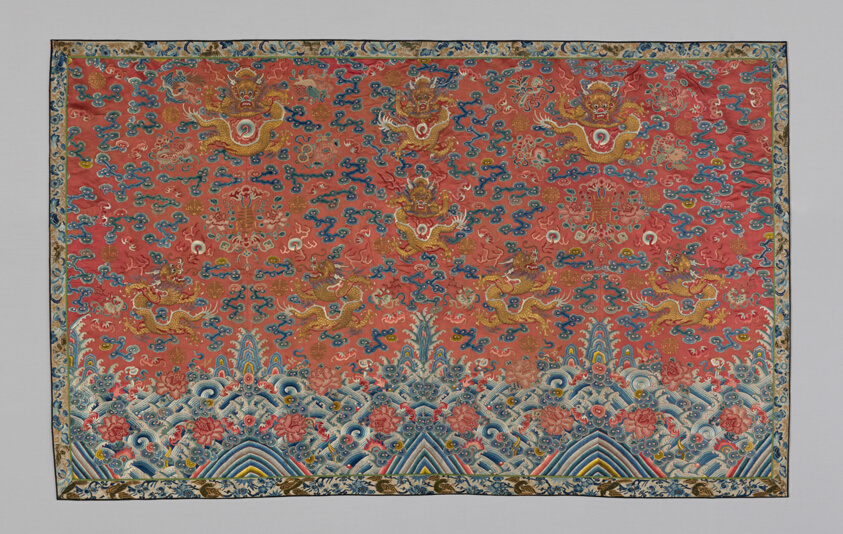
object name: Textile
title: Panel (Furnishing Fabric)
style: qing, Chinese (culture or style), East Asian, asian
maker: Manchu (China)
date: Qing Dynasty, (1644–1911), 1840/70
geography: China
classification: textile; weaving; furnishing textile